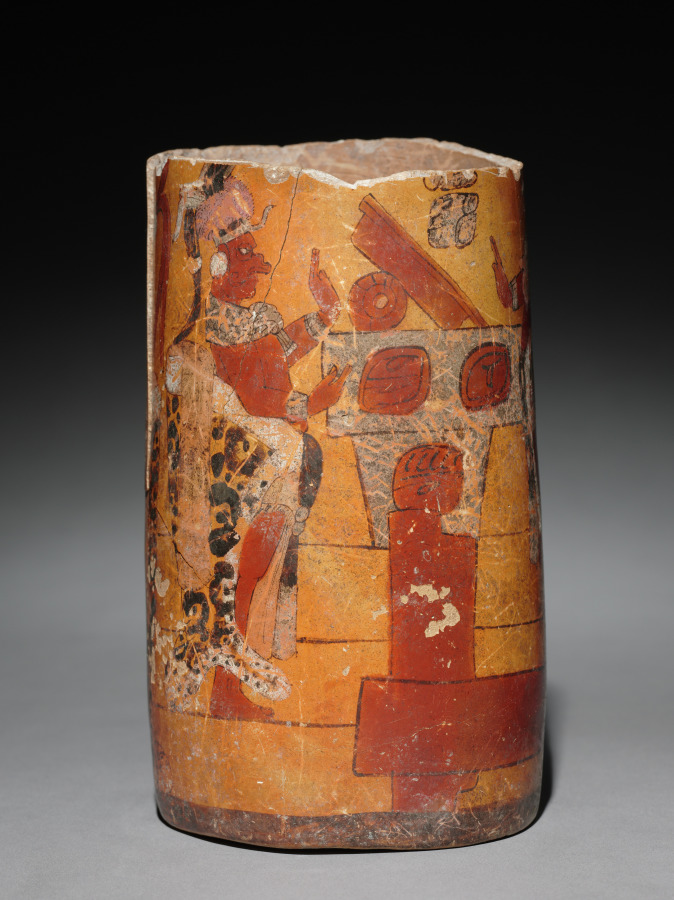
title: Cylindrical Vessel with Palace Scene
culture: Mexico or Central America, Maya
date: 600–900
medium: earthenware with colored slips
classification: Ceramic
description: The scene here may commemorate a special event in the life of a Maya ruler, who stands on a stairway before his throne, his legs framed by a litter on the ground. His gesture and the jaguar pelt at the waist visually unify him with his attendants. The ruler perhaps used the vessel as a drinking cup on important occasions; fine ceramics also served as gifts and as offerings in tombs.